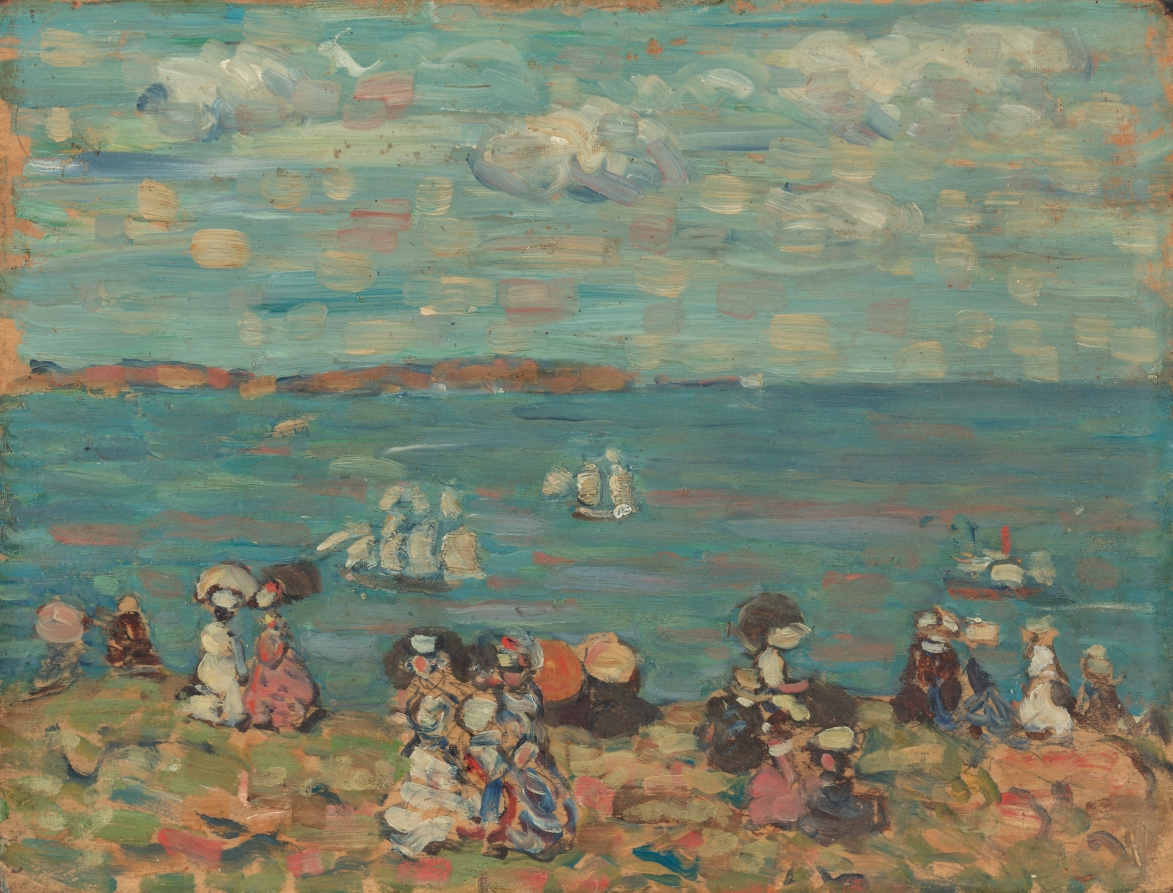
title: St. Malo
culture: America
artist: Maurice Prendergast (American, born Newfoundland [now Canada], 1858–1924)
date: c. 1907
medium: oil on wood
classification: Painting